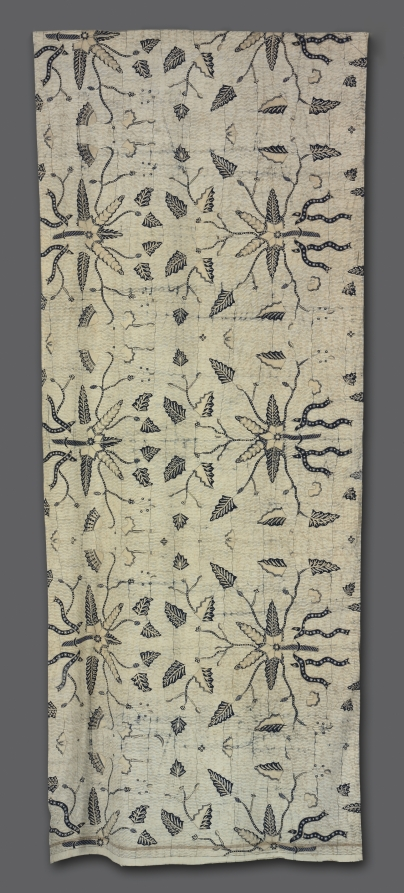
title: Sarong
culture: Indonesia, Java, 19th cenetury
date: 1850s-1860s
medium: plain weave cotton; resist dyed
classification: Textile